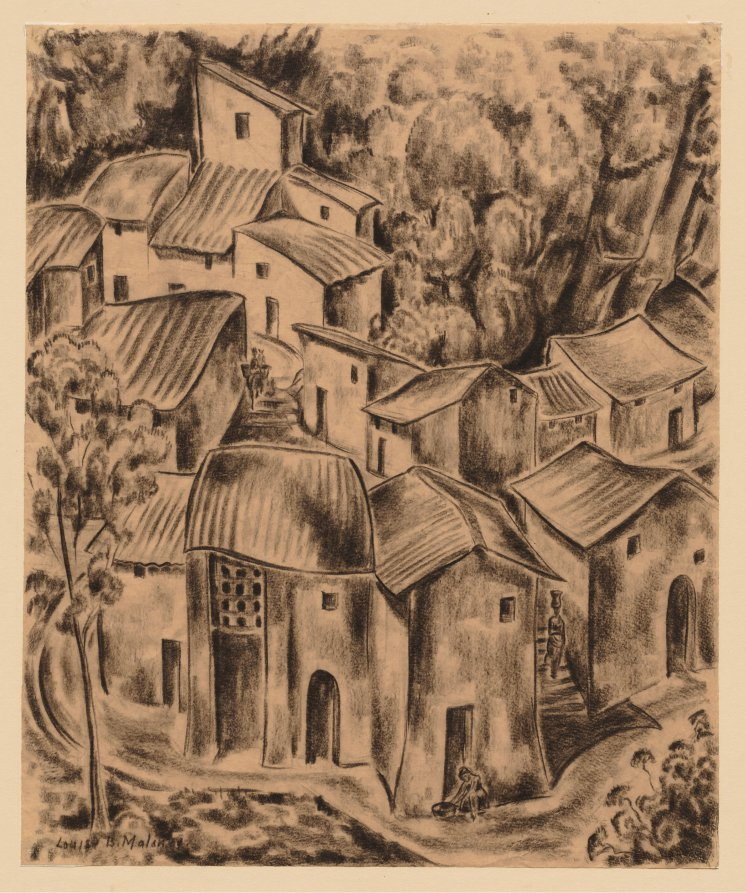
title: Ox Stalls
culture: America, Ohio, Cleveland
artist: Louise B. Maloney (American, 1887–1973)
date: before 1926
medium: crayon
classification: Drawing